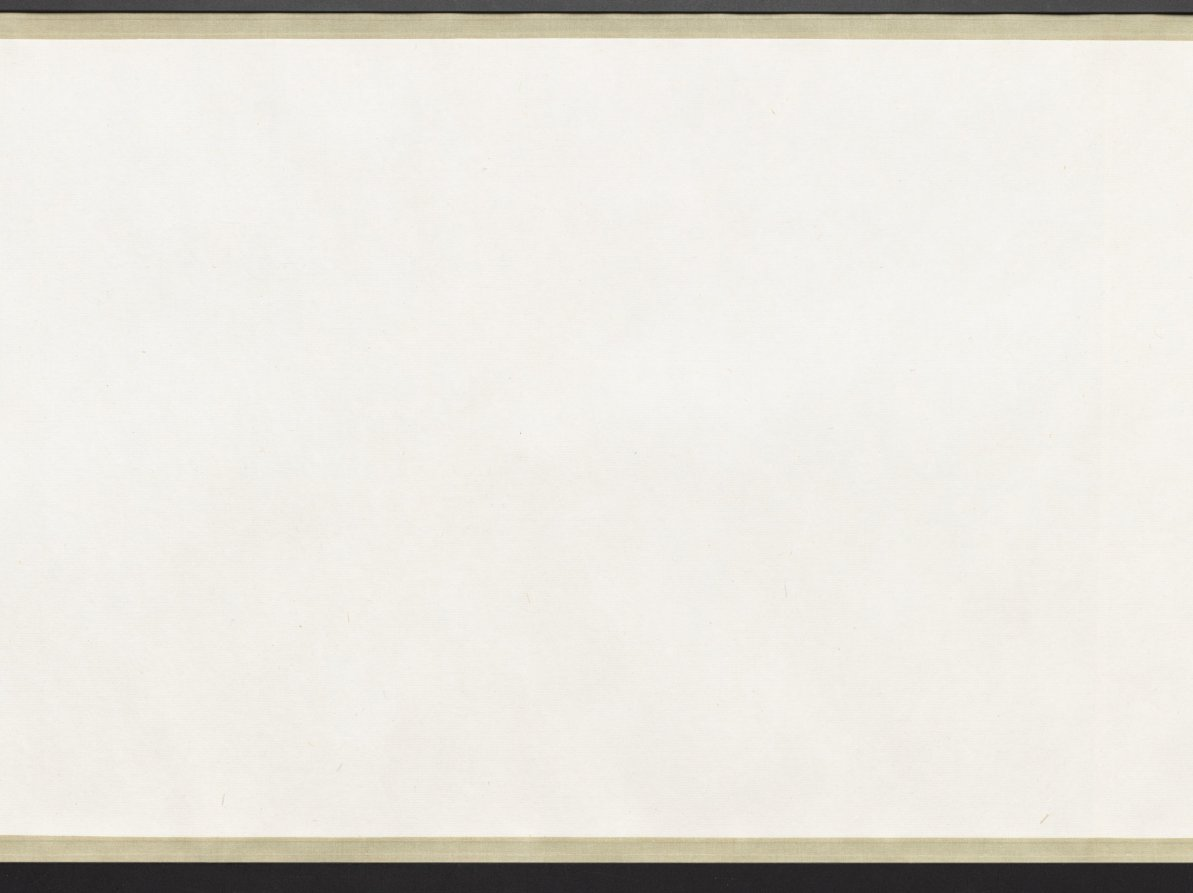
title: A Hundred Sparrows in a Lofty Grove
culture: China, Ming dynasty (1368–1644)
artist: attributed to Lin Liang (Chinese, 1416–1480)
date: 1368–1644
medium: handscroll; ink on silk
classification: Painting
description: Sparrows engaged in all kinds of activities frolic amid leafy branches, blades of grass, rocks, and a waterfall. As our eyes move over the scroll, the artist engages us in enjoying the sparrows’ carefree movements in a natural setting. The charming birds were painted from close observation in swift and fluent brushstrokes. Sparrows are a common bird and in Chinese painting they often represent the commoner in human society as opposed to the noble pheasant or peacock representative of the ruling class.